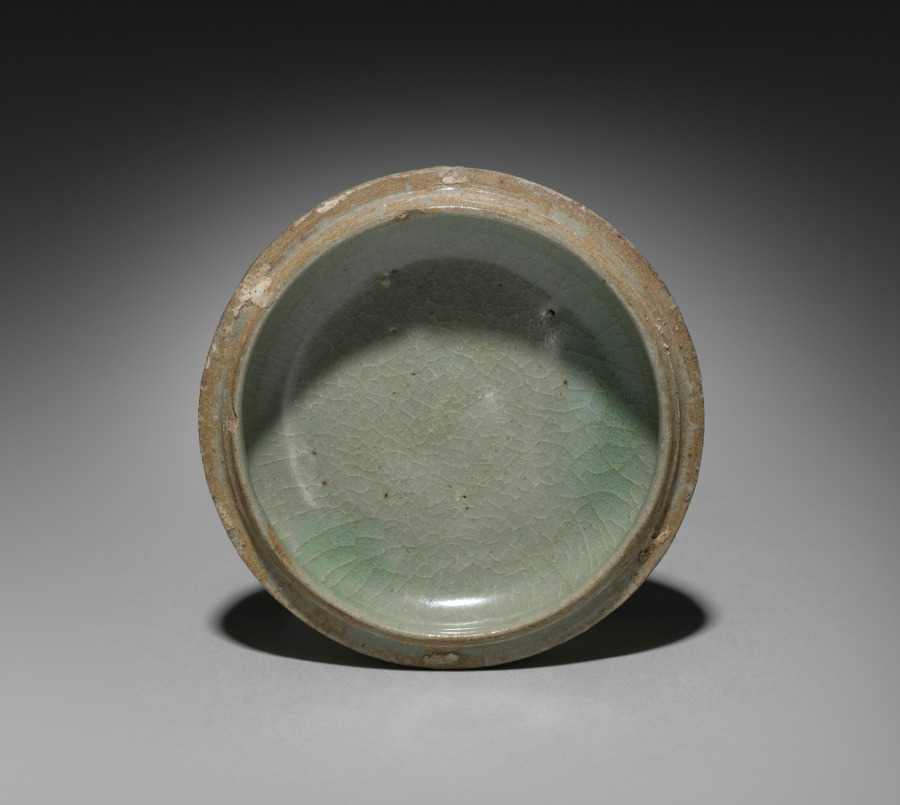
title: Box with Chrysanthemum and Scroll Design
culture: Korea, Goryeo dynasty (918–1392)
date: 918–1392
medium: inlaid celadon ware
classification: Ceramic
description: Celadons, spoons, seals, and bronze mirrors were the most common burial objects in tombs during the Goryeo period (918–1392). Once used to contain colored powder, rouge, and eyebrow gel for makeup, this small container was one of the standard goods that furnished elites' tombs. Both women and men used the grain powder of rice or millet for whitening their skin, safflower extract for rouge, and plant ash or soot for eyebrow gel. Yet, natural-looking makeup seems to have been the most favorable one in Korea according to the travelogue by Xu Jing (1091–1153), the Chinese diplomat who visited Korea in 1123.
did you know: This ceramic container was used to store either incense or cosmetics.